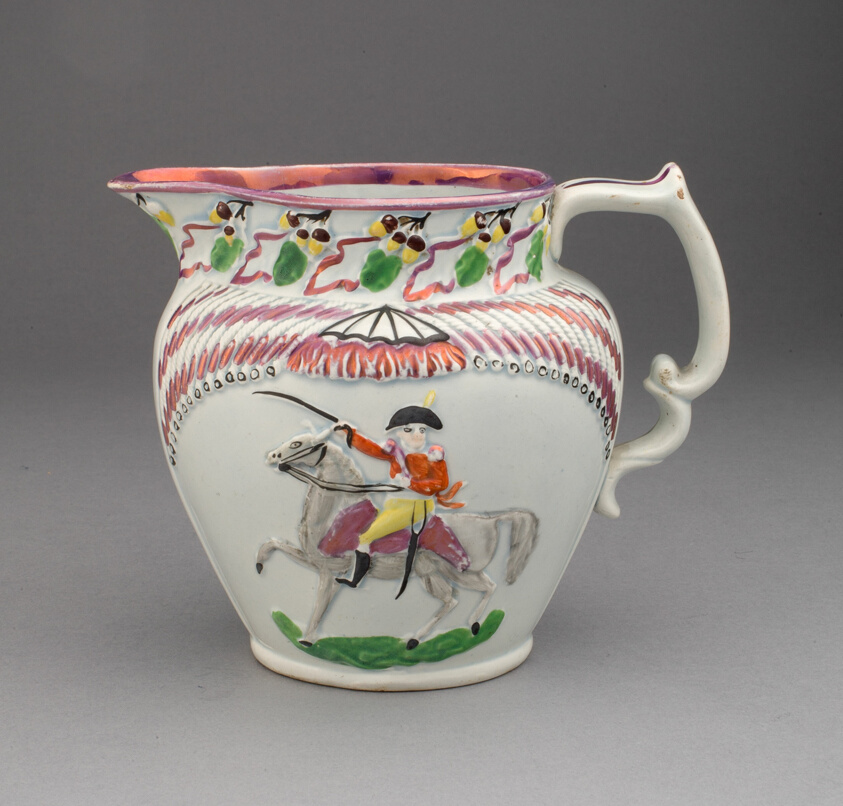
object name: Ceramics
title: Pitcher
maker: England, Staffordshire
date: c. 1815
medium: Lead-glazed earthenware with lustre decoration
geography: Staffordshire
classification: pitcher (vessel); earthenware; vessel; european decorative arts; ceramics